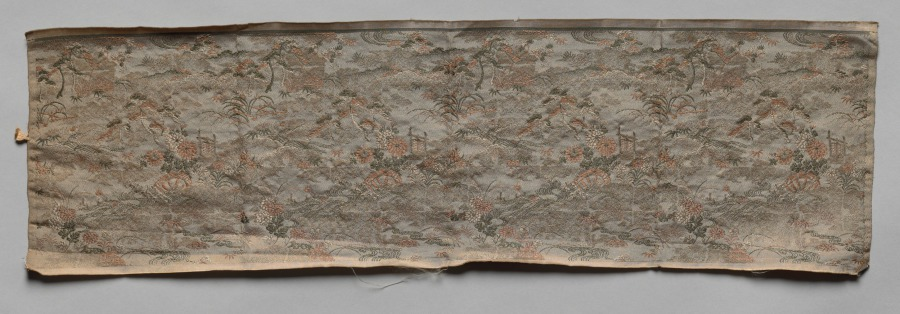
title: Textile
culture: Japan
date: late 1800s-early 1900s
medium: silk, metallic thread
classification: Textile